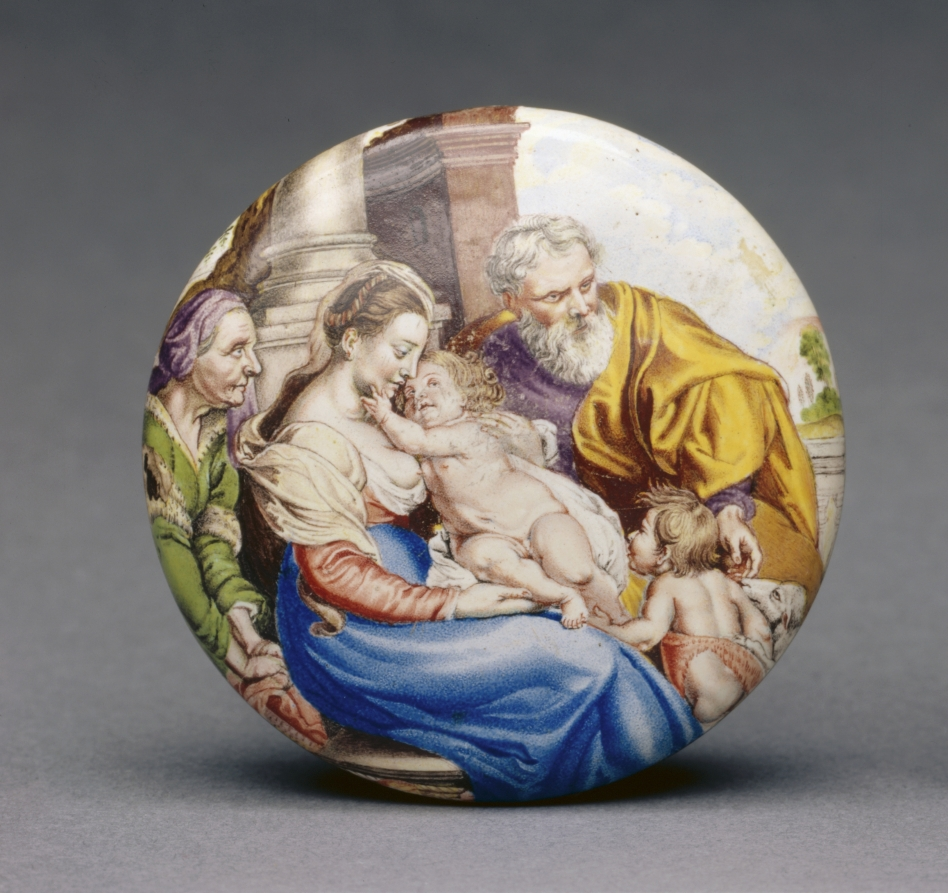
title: Watchcase (Boîtier de montre)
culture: France, 17th century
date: c. 1640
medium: gold and enamel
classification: Jewelry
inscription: [engraved on the rim]: "B8"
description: In the 1630s, the practice of painting with enamel on metal became a means for French miniature painters to achieve a more richly colored, durable product. Previously miniatures were painted with watercolor on vellum, a material made from animal skin. This case would have originally held a watch, but was later transformed into a simple box through the removal of the watch mechanism and ring. This watch case is richly painted inside and out with miniatures modeled after well-known religiously allegorical works.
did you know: Inspiration for the box’s miniatures was drawn from works by Peter Paul Rubens’ The Holy Family with Saints John the Baptist and Elizabeth (1615) (back panel) and Nicolas Cochin (interior base).